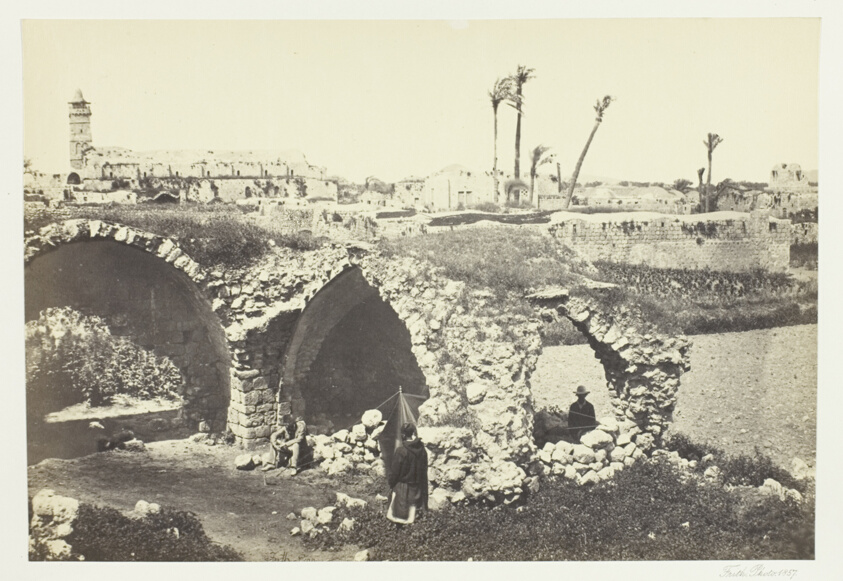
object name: Photograph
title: Ramleh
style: 19th century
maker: Francis Frith (English, 1822–1898)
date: 1857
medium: Albumen print, pl. 24 from the album "Egypt and Palestine, Volume II" (1858/60)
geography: England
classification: albumen silver print; photographic process; photography; photograph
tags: Collected by Hugh Edwards, Egypt and Palestine